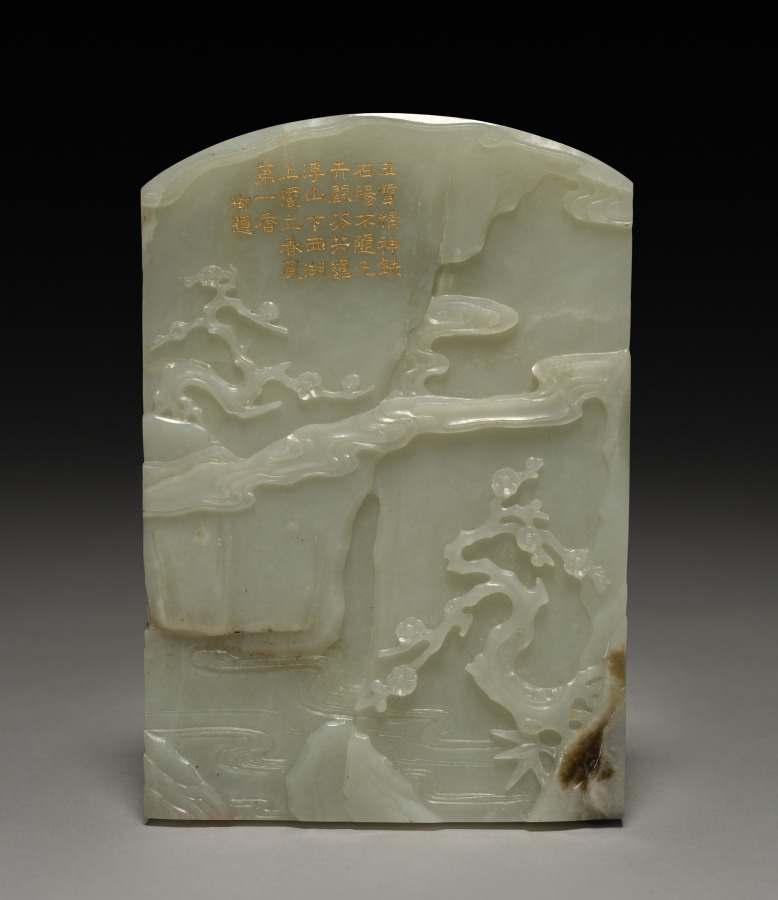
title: Table Screen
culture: China, Qing dynasty (1644–1911), Qianlong reign (1736–95)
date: 1736–95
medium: jade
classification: Jade